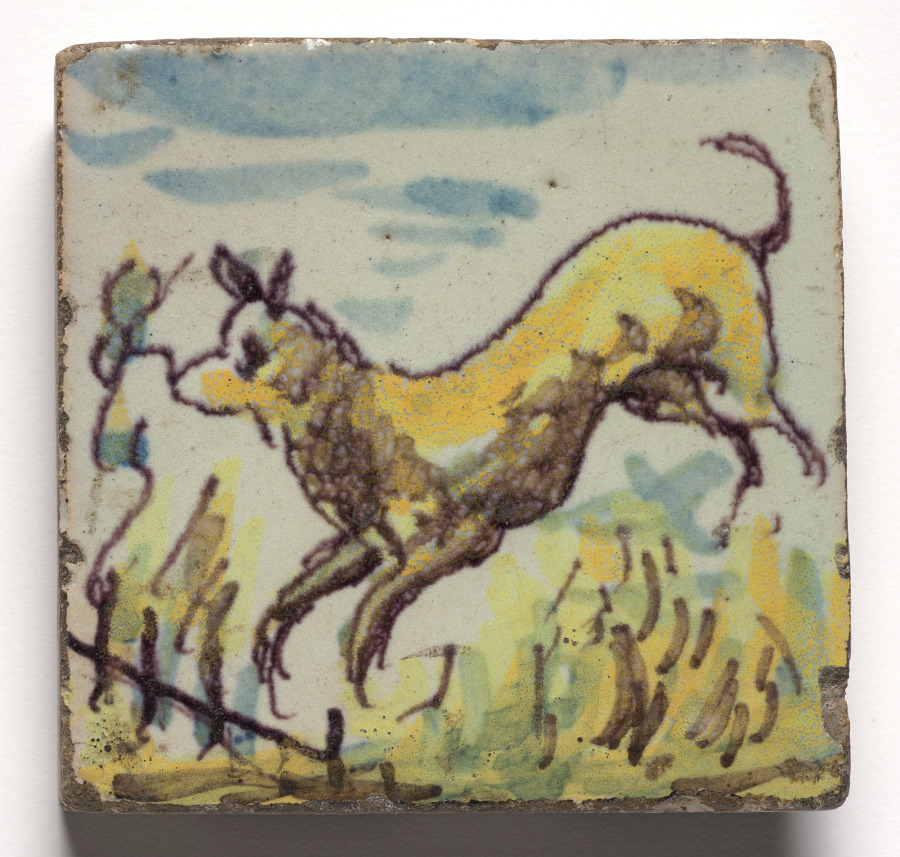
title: Wall Tile–Leaping Animal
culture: Spain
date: c. 1600s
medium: glazed ceramic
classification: Ceramic